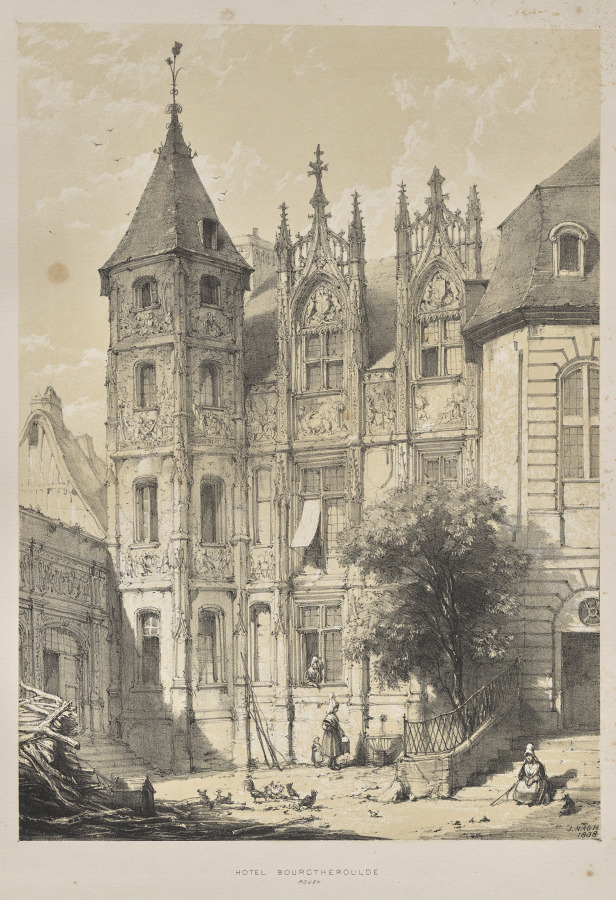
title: Architecture of the Middle Ages: Hotel Bourgtheroulde, Rouen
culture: England, 19th century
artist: Joseph Nash (British, 1808–1878)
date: 1838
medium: lithograph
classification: Print